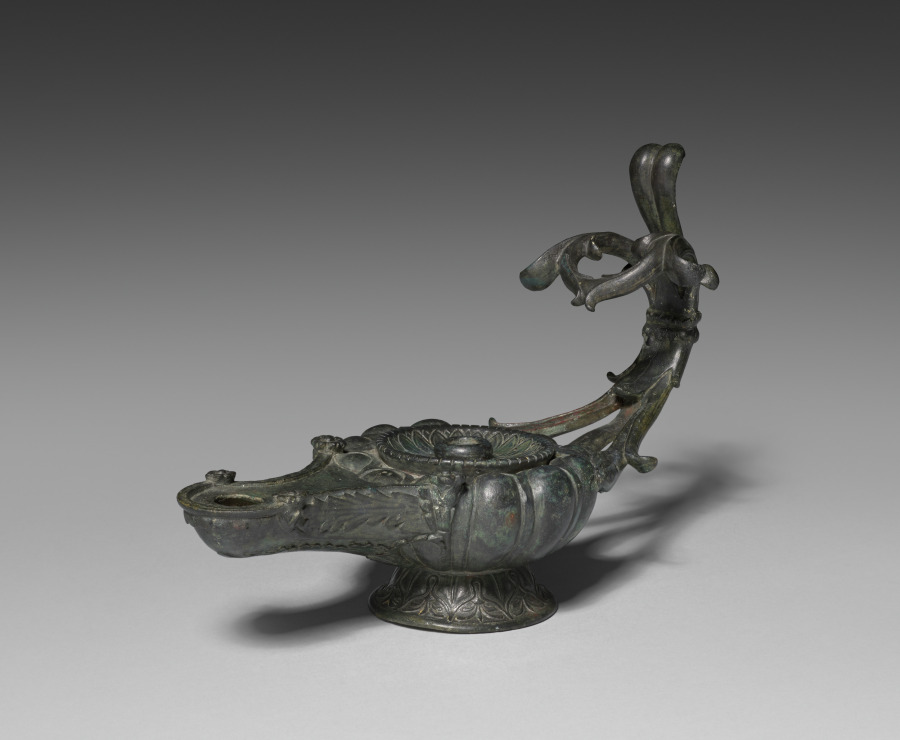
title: Oil Lamp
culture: Roman, late Republican-early Imperial (c. 50 BCE – 50 CE)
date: c. 50 BCE–50 CE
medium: Bronze, cast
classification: Metalwork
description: This large and ornate cast bronze oil lamp features a central hole for filling and a single spout for its wick. Its extravagant handle rises to create both a loop and a sort of hook, one or both of which may have served to suspend the lamp when lit. Alternatively, the lamp may have stood on its own, perhaps atop a tall lampstand. While its primary function may have been for lighting dark spaces, this lamp must also have served an ornamental purpose.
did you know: When used, this lamp likely hung from the ceiling or stood on a tall lampstand.